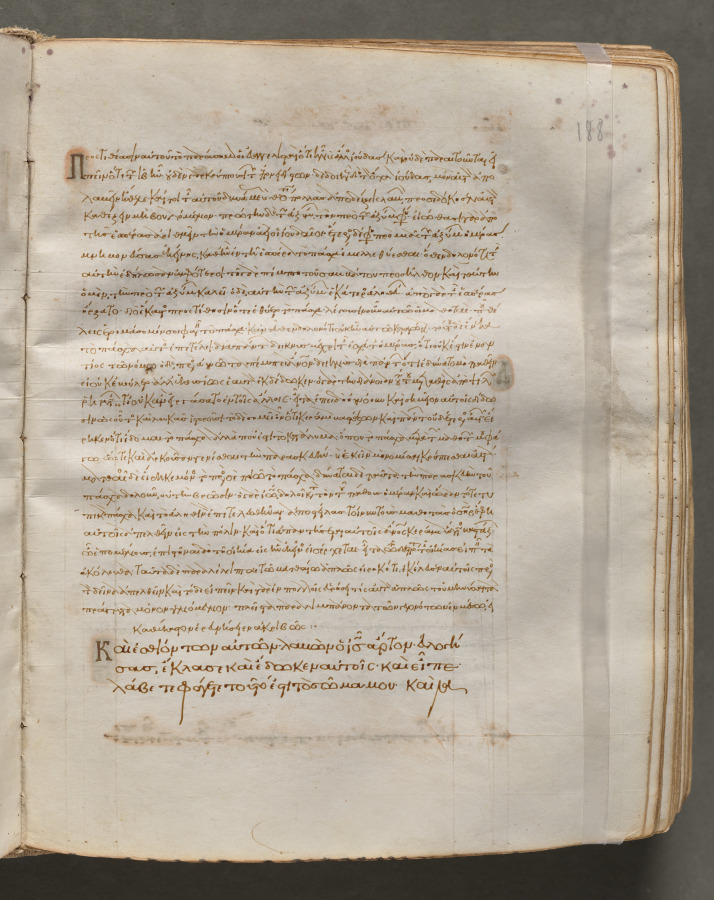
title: Text, folio 188 (recto), from a Gospel Book with Commentaries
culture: Byzantium, Constantinople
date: c. 1000–1100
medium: ink, tempera, and gold on vellum; leather binding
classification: Bound Volume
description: Each of the four gospels in this book opens on a page with brilliantly illuminated borders depicting the author of the text as well as birds-principally peacocks, symbols of the immortality of the soul-and fountains, representing the fountain of life and the salvation of the soul. This volume consists of 428 leaves with texts in Greek. Its level of sophistication suggests that it was probably written and decorated in a monastery in Constantinople.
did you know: Gospel Books were carried in procession through Byzantine churches.